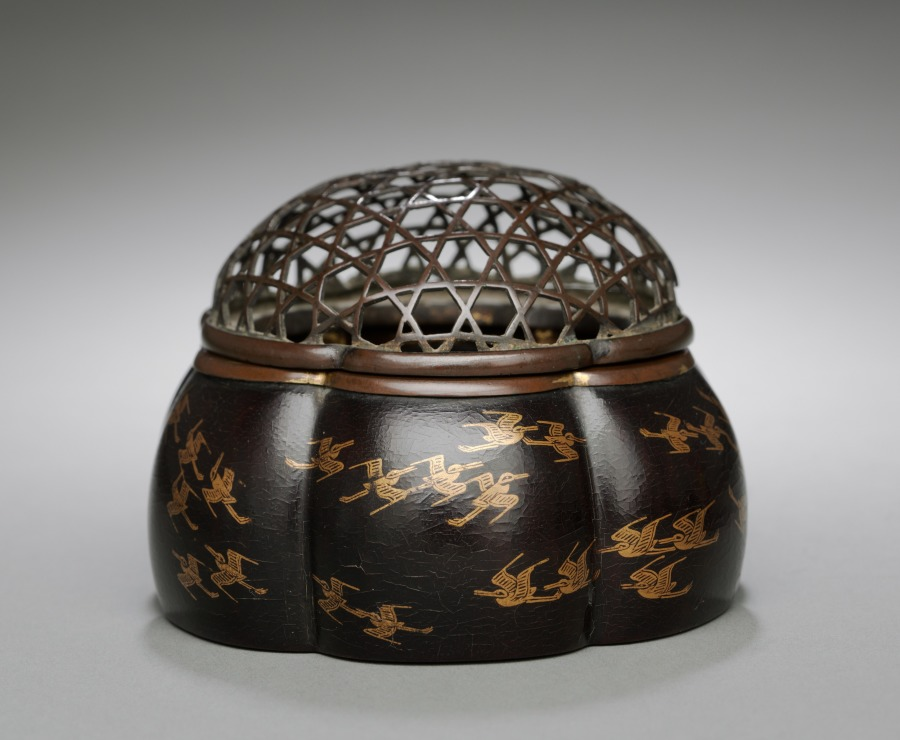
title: Incense Burner with Lid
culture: Japan, Nanbokuchō period (1336–92)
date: late 1300s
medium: black lacquer on wood with decoration in maki-e; metal rims; bronze lid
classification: Lacquer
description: This container's repeated, undulating, rounded sides evoke waves over which the articulated plovers sweep. The bronze cover (probably a later addition) mimics the design of a fishing weir. Overall, the container brings to mind the seashore. The earthy quality of the lacquered surface demonstrates the interaction between a man-made pattern (the plovers) and the somewhat unexpected surface of a natural material such as wood.